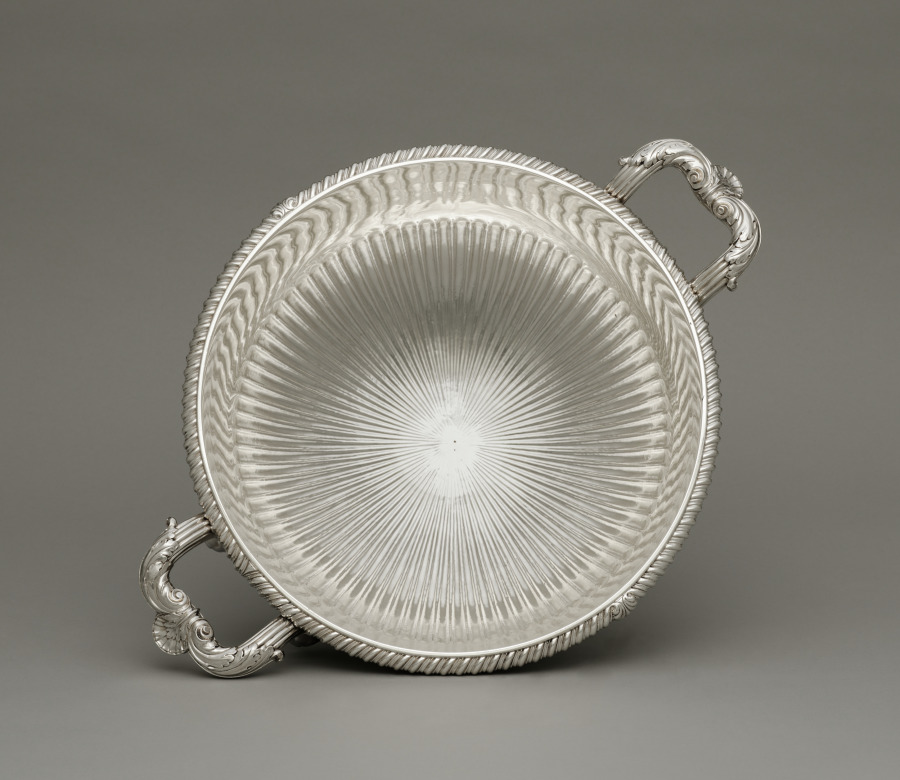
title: Tureen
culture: England, London, 19th century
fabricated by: Paul Storr (British, 1771–1844)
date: 1812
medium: silver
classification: Silver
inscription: coat of arms: Hutton impaling Chaytor; crest: Hutton. (Arms of Timothy Hutton (1729-1864) of Marske and Clifton Castle, Yorkshire, and his wife Elizabeth Chaytor of Spennithorne Hall, who were married in 1804.)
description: Silver fulfilled a prominent role in projecting wealth, status, power, and ritual in British life during the 1600s and 1700s. Elaborate forms such as this tureen, with its acanthus leaves and fluted detailing, not only represented wealth in its sheer silver weight but also provided royal and aristocratic owners a surface for displaying engraved coats of arms. The arms of the High Sheriff of Yorkshire, Timothy Hutton and his wife Elizabeth Chaytor of Spennithorne Hall in northern England are engraved on this tureen by Paul Storr, one of the most prominent London silversmiths of the period.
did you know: This tureen is accompanied by a cover and stand. See cover record.